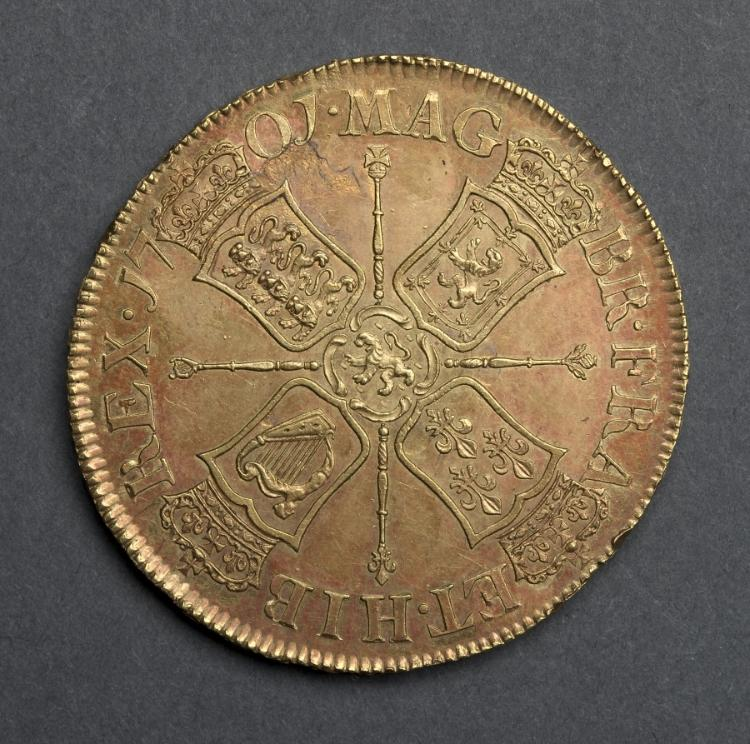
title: Five Guineas: Crowned Shields, Scepters, and Lion of Nassau (reverse)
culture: England, William III, 1694-1702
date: 1701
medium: gold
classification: Coins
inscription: MAG . BR . FR . ET . HIB . REX . 1701.